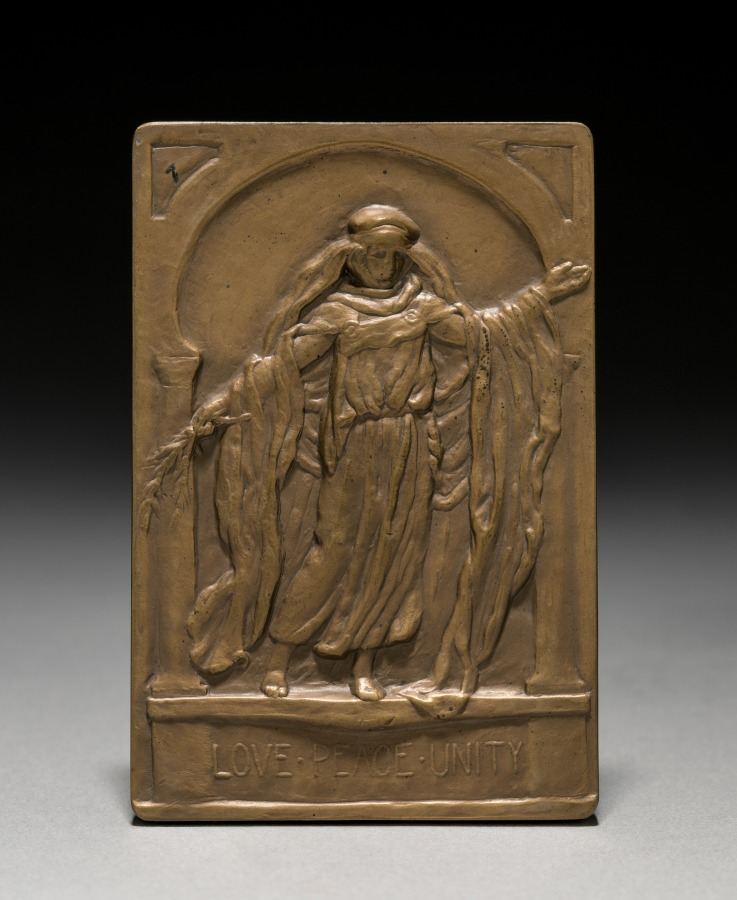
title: Medal: Abdul Baha (reverse)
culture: America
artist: Louis McClellan Potter (American, 1873–1912)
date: 1912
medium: bronze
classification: Metalwork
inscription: below: "LOVE . PEACE . UNITY."